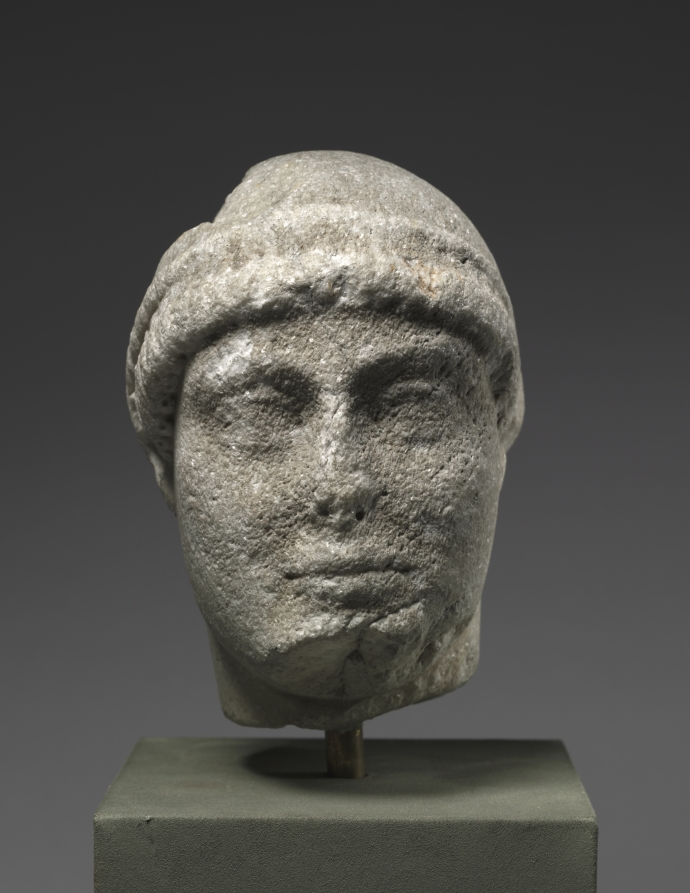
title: Head of Youth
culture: Sicily(?), Greek, Severe period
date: c. 470 BCE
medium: marble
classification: Sculpture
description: Although the face is now badly broken and quite weathered, this head was originally of high-quality workmanship, as can be seen in the extremely fine carving of the wavy hair preserved at the top and back. The slight asymmetry of the neck and facial features suggest that the head, which likely belonged to a full-bodied sculpture just under life-size, turned gently to one side.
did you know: The Severe style, named for its sober simplicity, marks the beginning of the Greek Classical period, c. 480–450 BC.